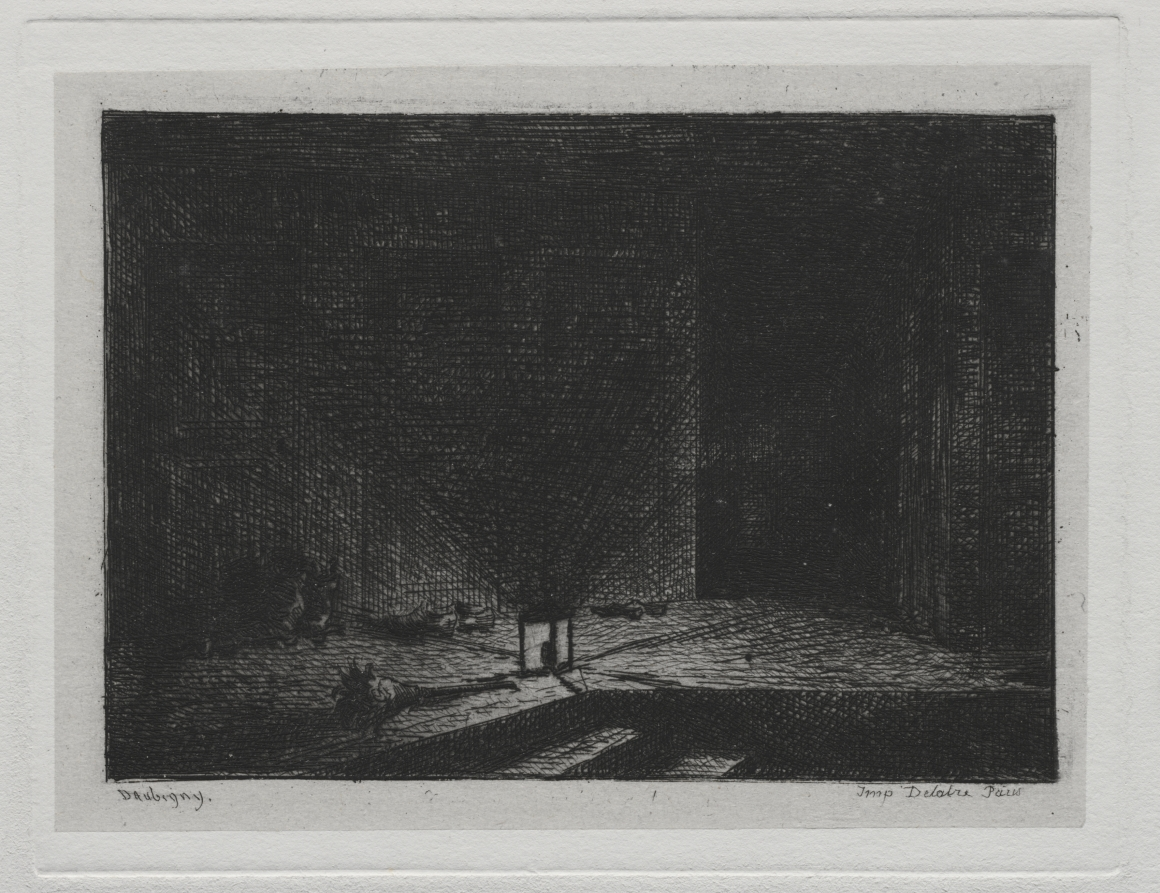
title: The Boat Trip: Interior of an Inn (The Corridor of an Inn)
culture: France, 19th century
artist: Charles François Daubigny (French, 1817–1878)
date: 1861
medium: etching with chine collé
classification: Portfolio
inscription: lower left in corner: L. D. 107